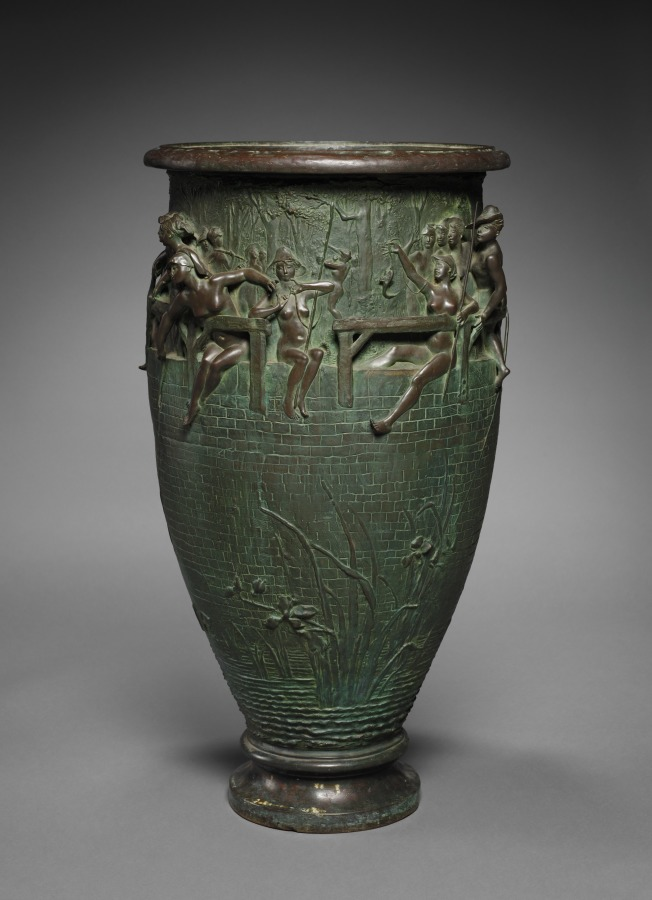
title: Vase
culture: France, 19th century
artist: Gustave-Joseph Chéret (French, 1838–1894)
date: c. 1890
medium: bronze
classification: Sculpture